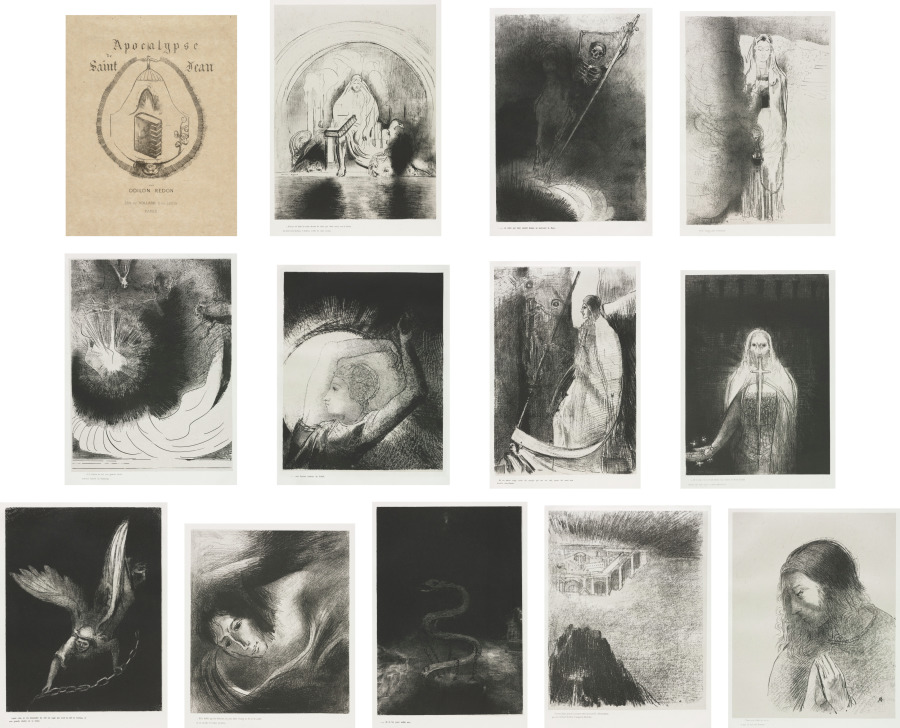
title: The Apocalypse of Saint John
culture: France, late 19th Century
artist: Odilon Redon (French, 1840–1916)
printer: Blanchard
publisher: Ambroise Vollard (French, 1867–1939)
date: 1899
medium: twelve lithographs on wove paper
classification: Print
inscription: printed at center: Apocalypse / de / Saint Jean / ODILON REDON / Édité par VOLLARD, 6 rue Laffitte / PARIS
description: The last of Odilon Redon’s 11 lithographic portfolios, this series relates to the Book of Revelation from the Christian Bible. The subject had been explored throughout art history, allowing the artist to align himself with past masters, such as Albrecht Dürer. Although Redon often vaguely referenced texts, these prints directly illustrate 12 individual passages, including one about a woman clothed with the sun and another focused on a great star falling from heaven. By the time he created this portfolio, Redon’s reputation was well established. The project was published by art dealer Ambroise Vollard, who began to sell and promote Redon’s work about a year earlier, building a market for his prints in Paris and abroad.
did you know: This is one of the last works where Redon experimented with lithograph and all-black medium. In contrast, bright, dazzling colors characterize his late works.